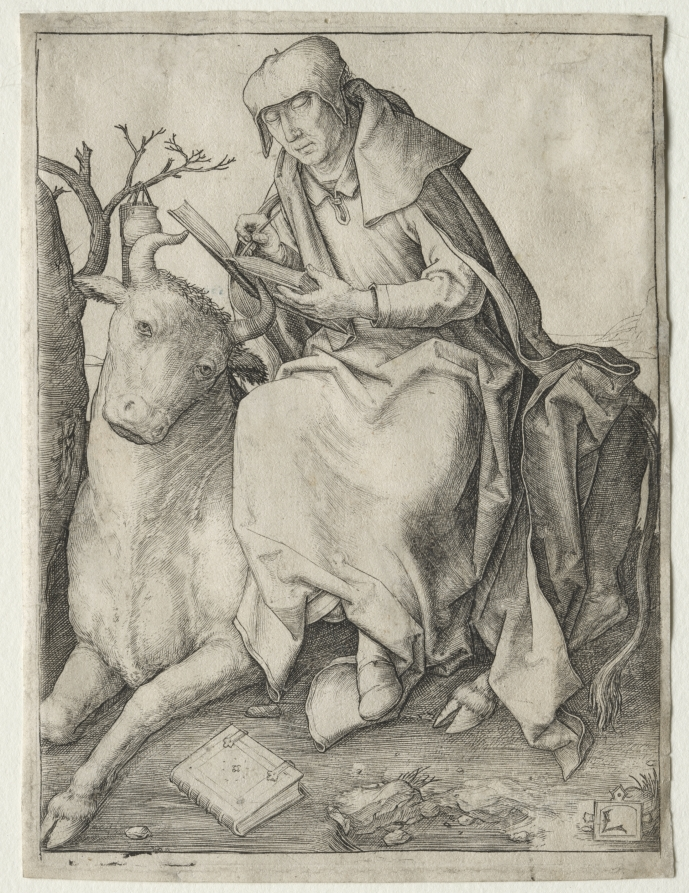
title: St. Luke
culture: Netherlands, 16th century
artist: Lucas van Leyden (Netherlandish, 1494–about 1533)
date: c. 1508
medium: engraving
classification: Print